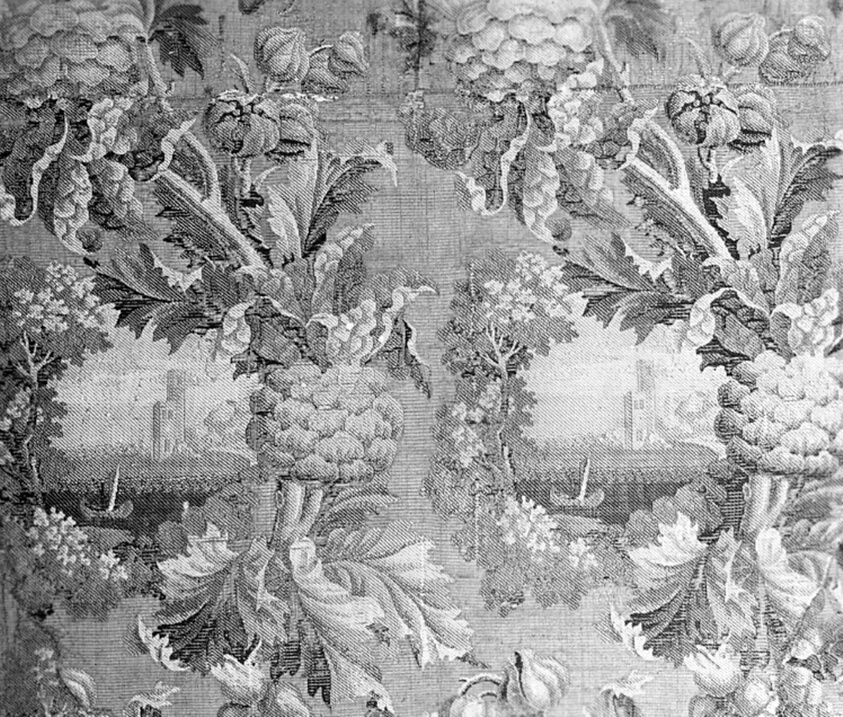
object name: Textile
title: Fragment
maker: France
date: Mid–18th century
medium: brocaded silk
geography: France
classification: textile; weaving